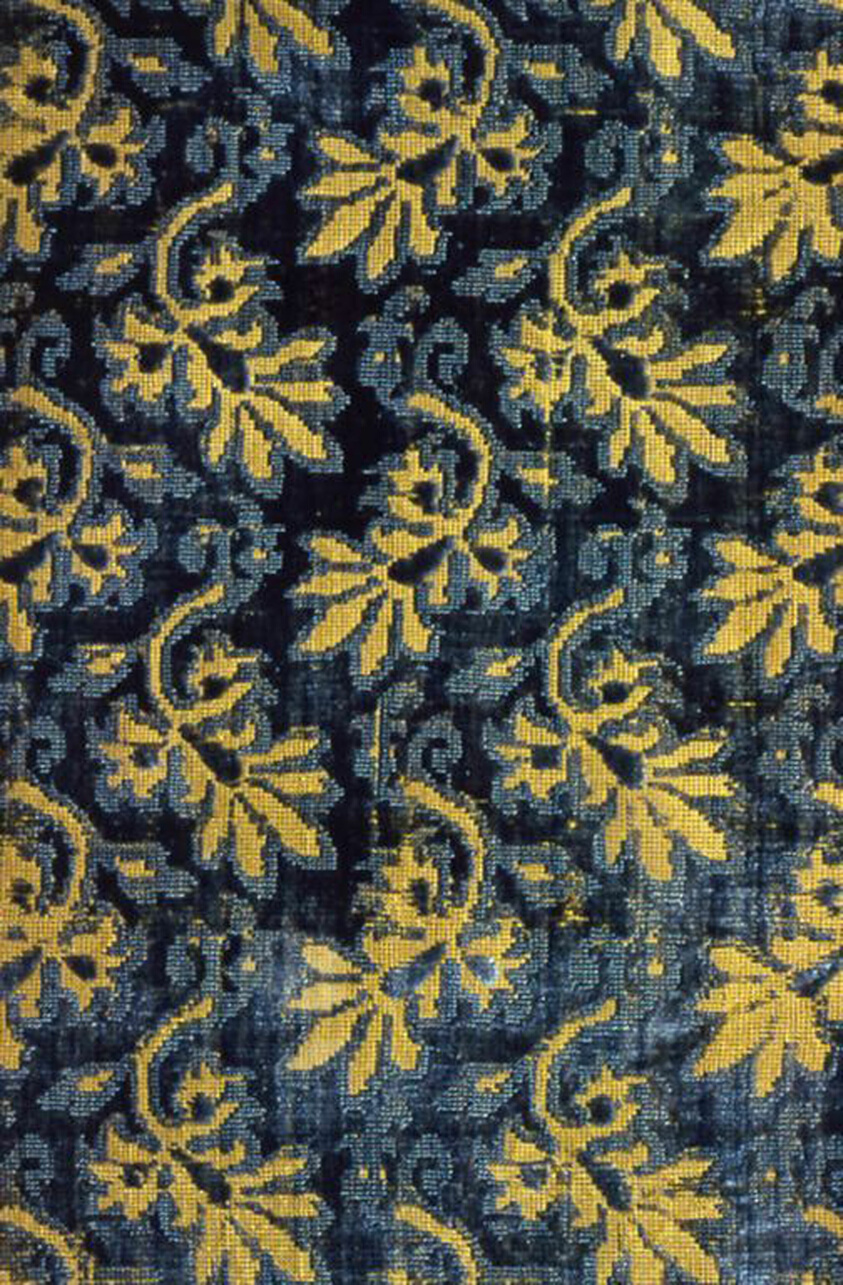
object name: Textile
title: Panel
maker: Italy or Spain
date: 1601/25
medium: Silk, plain weave with supplementary pile warps forming cut and uncut voided velvet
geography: Italy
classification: textile; weaving - velvet